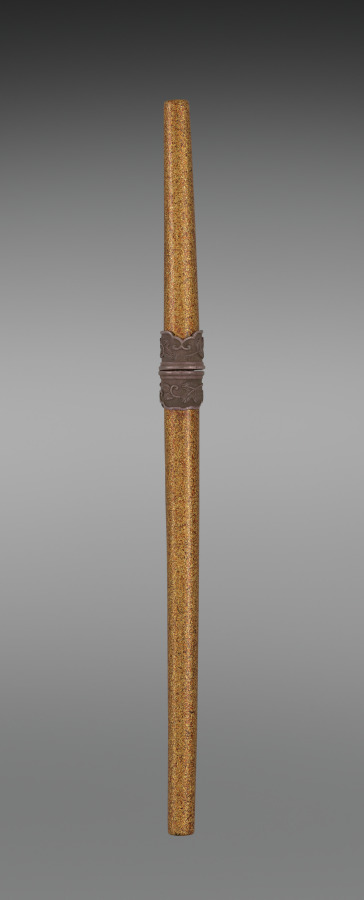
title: Writing Box (Suzuribako) with the “First Song” (Hatsune) Chapter from the Tale of Genji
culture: Japan, Meiji period (1868–1912)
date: early 1900s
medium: Lacquered wood with gold and silver sprinkled powder (maki-e), foil application (kirikane), and metal inlay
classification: Lacquer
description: The design of this box was inspired by an object in the 1639 lacquer wedding set of Chiyohime, the daughter of the shogun (ruler). Information about the set became available in the Meiji period, leading some lacquer artists to emulate its designs. This box features a scene from the chapter “First Song” (Hatsune) of the Tale of Genji, in which Prince Genji and his love Murasaki enjoy her garden. It incorporates the written characters for “first” (初, hatsu) and “sound” (音, ne), indicating the first song of the warbler in spring, associated with the new year—the water dropper for mixing the ink is in the shape of this bird.